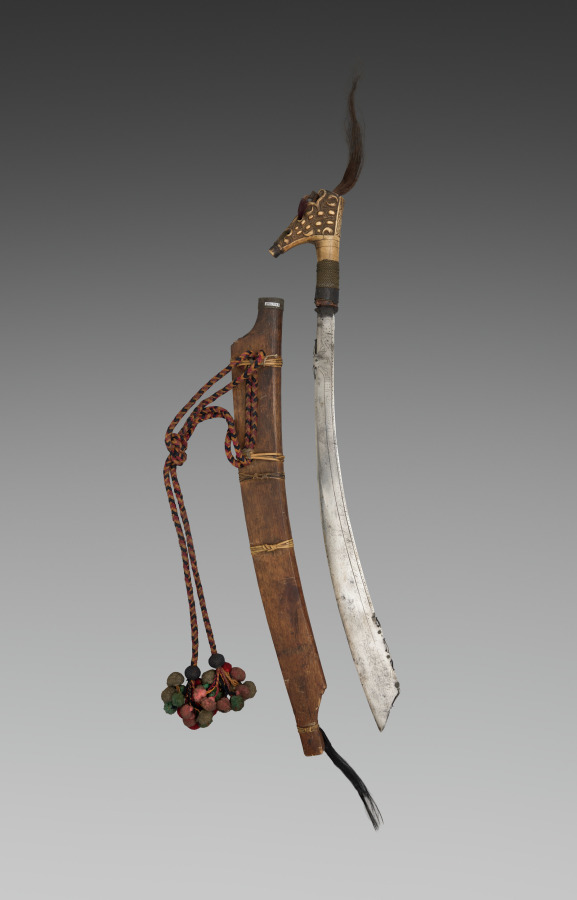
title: Knife (Mandau) and scabbard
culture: Indonesia, Borneo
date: c. 1900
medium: metal, wood, bone, hair, and braided cloth cord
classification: Arms and Armor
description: Both a work of art and a weapon, blades of this type with elaborately carved and plumed hilts were used mainly by the Dyak people of Kalimantan, on the Indonesian Island of Borneo.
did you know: Borneo is the third largest island in the world.